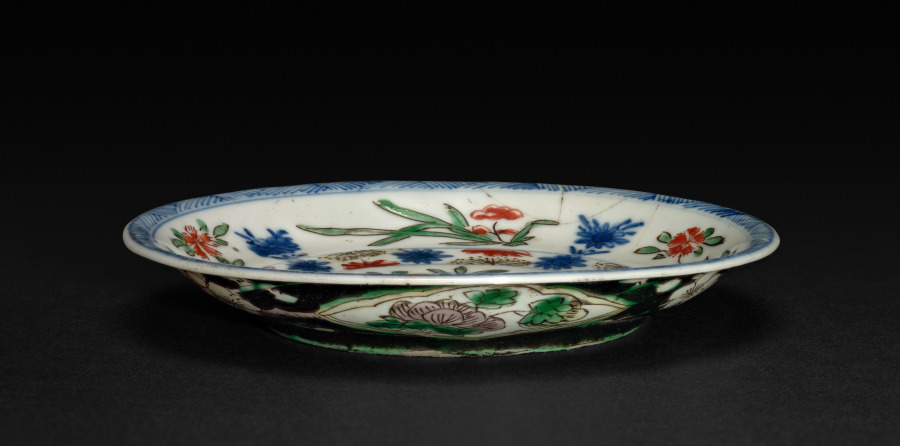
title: Saucer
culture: China, Qing dynasty (1644-1911), Kangxi reign (1662-1722)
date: 1662–1722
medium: porcelain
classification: Ceramic